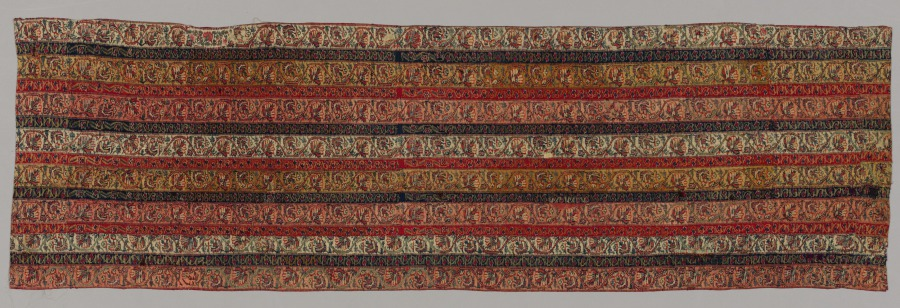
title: Fragment: Back of a Coat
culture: India, Kashmir, 19th century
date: after 1830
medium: twill weave, brocaded; wool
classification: Textile